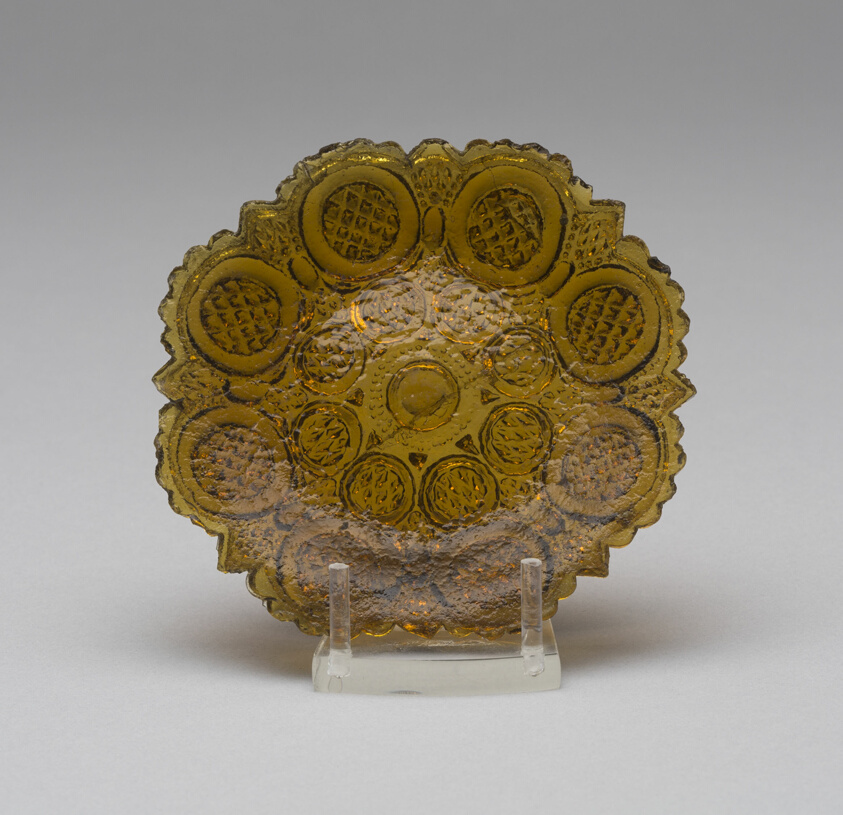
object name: Glass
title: Cup plate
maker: Artist unknown (American, 19th century); Midwest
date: 1830–35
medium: Pressed glass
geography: Midwest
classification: plate (general, dish); glass; american decorative arts; american arts; decorative arts